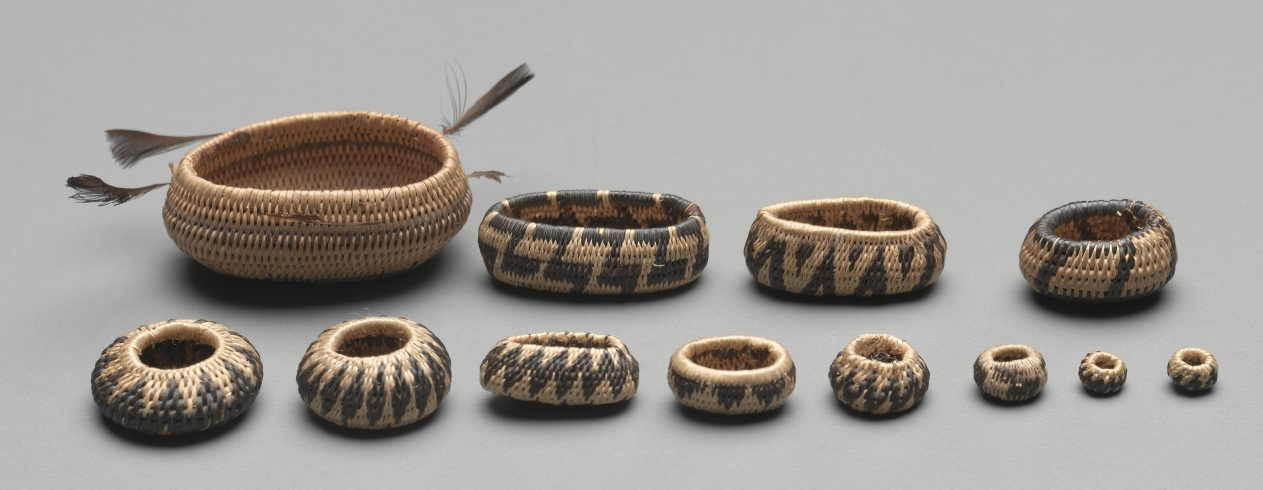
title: Miniature Round Basket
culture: California, Pomo, late 19th-early 20th century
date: late 1800s-early 1900s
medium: plant materials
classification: Basketry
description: Miniature baskets were made to demonstrate the basket-maker’s virtuoso skill, and these tiny marvels seem to be no exception -- the smallest are just a few millimeters wide but still patterned. For such fine work, dexterity was required as much for preparation of materials as for weaving.